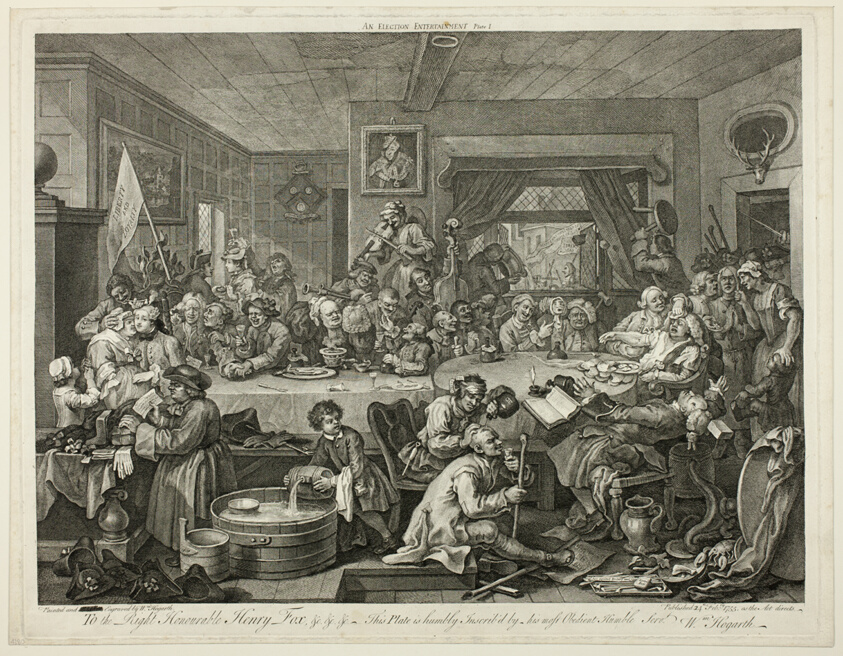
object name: Print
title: An Election Entertainment, plate one from Four Prints of an Election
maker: William Hogarth (English, 1697-1764)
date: 1757/58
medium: Engraving in black on cream laid paper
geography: England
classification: etching; print; prints and drawing